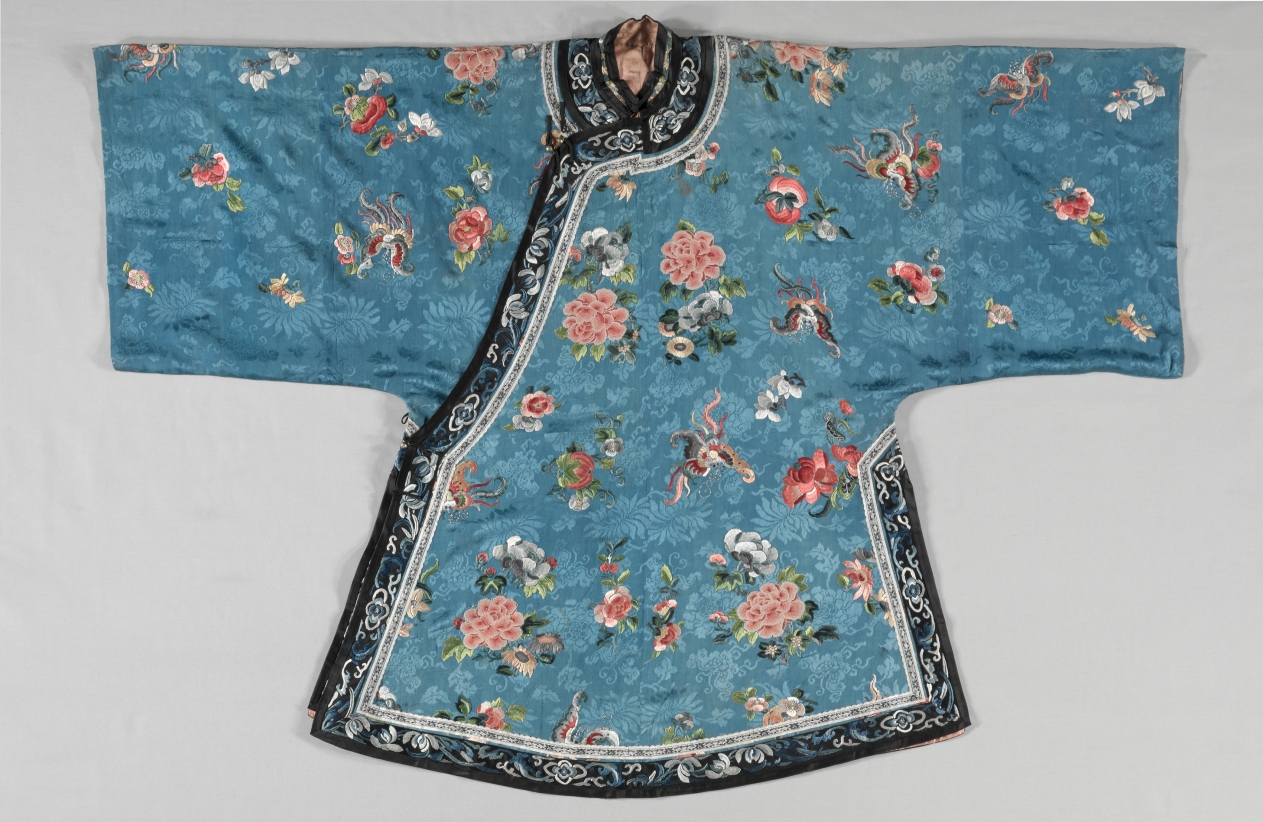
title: Han Woman's Jacket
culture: China, Qing dynasty (1644–1911)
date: 1880s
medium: Silk: embroidery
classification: Garment